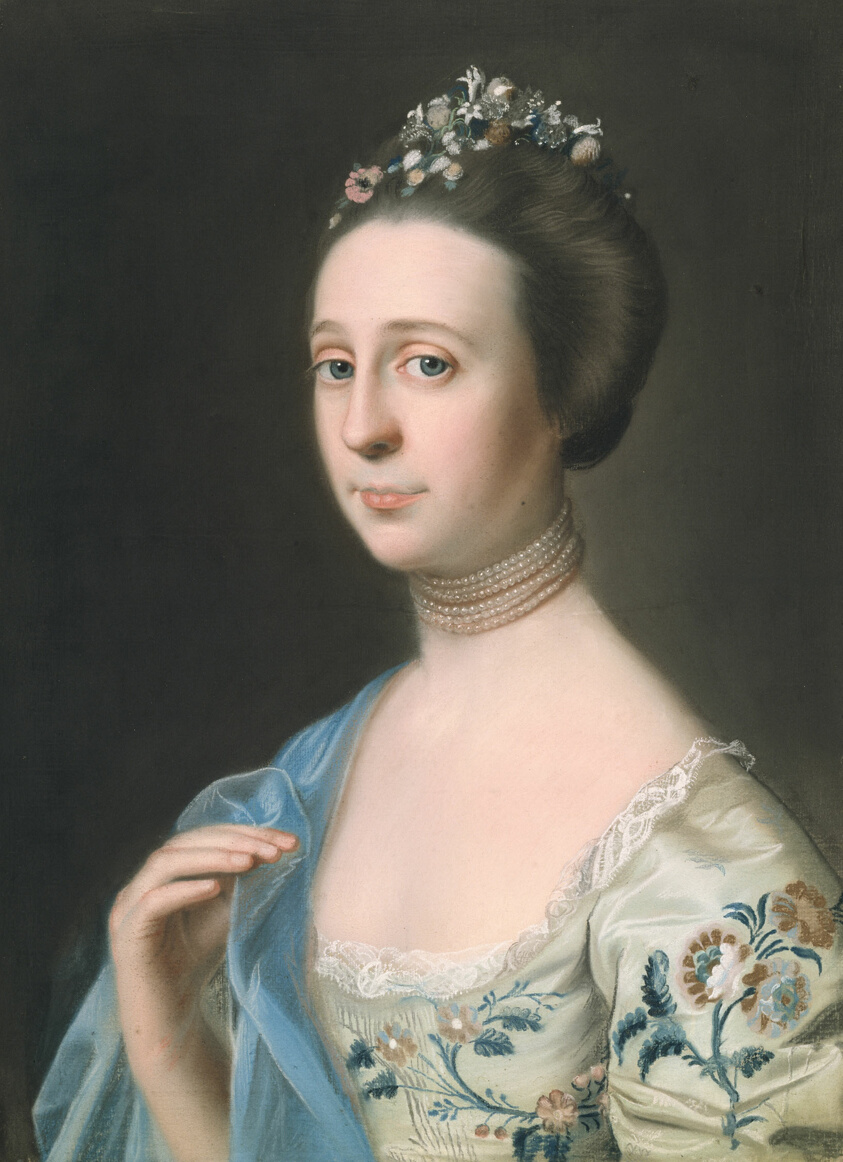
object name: Painting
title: Mrs. Henry Hill (Anna Barrett)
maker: John Singleton Copley (American, 1738–1815)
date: c. 1765–70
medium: Pastel on paper mounted on linen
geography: United States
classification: painting; american arts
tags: fashion, people, portraits